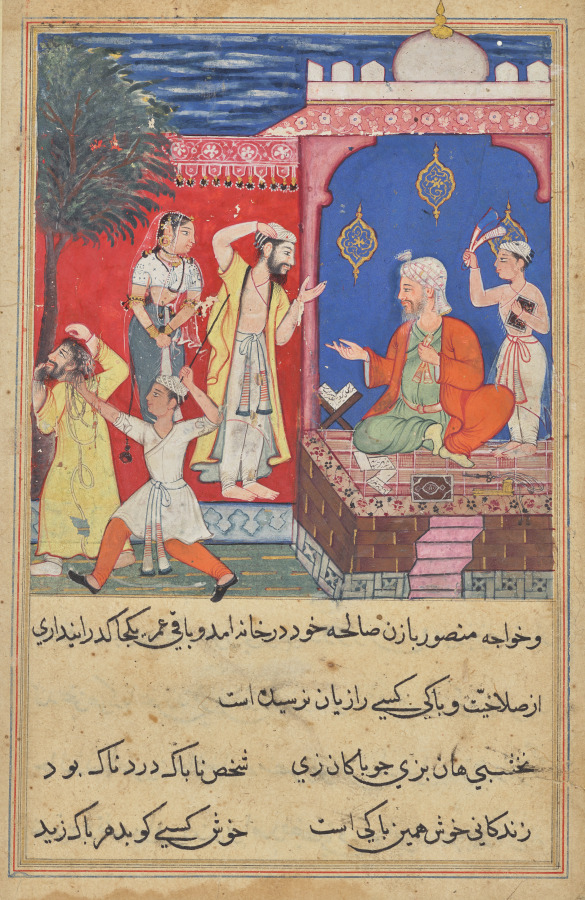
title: The false Mansur punished before the judge and expelled from the city, from a Tuti-nama (Tales of a Parrot): Seventeenth Night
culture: Mughal India, court of Akbar (reigned 1556–1605)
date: c. 1560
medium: gum tempera, ink, and gold on paper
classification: Painting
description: When the true merchant Mansur returns home to find an imposter in his place, he takes him to a judge to settle the matter. After testimony of Mansur’s wife, the imposter is revealed. In the image, the real Mansur stands with his wife, addressing the seated judge. Below them, the imposter is led away, turban unraveled, while being beaten with a stick.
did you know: The documents before the judge are marked with Arabic script, implying an Islamic context.